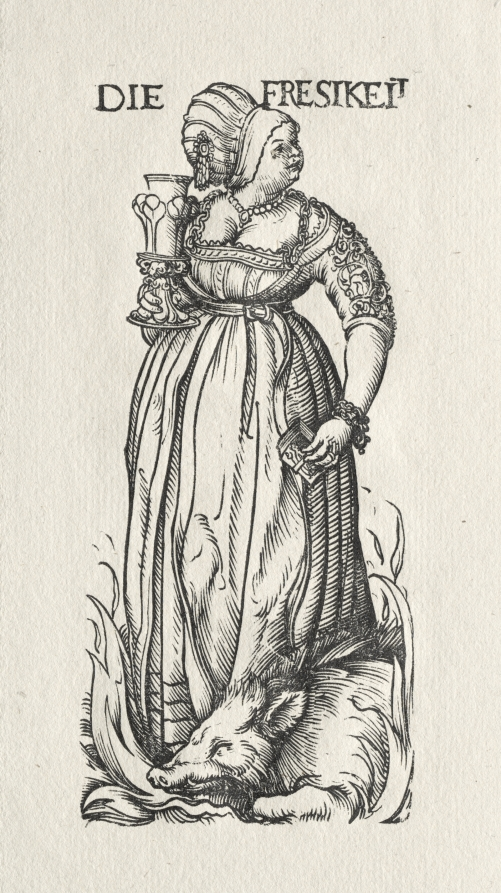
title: The Seven Vices: Gluttony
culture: Germany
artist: Hans Burgkmair (German, 1473–1531)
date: c. 1510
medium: woodcut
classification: Print